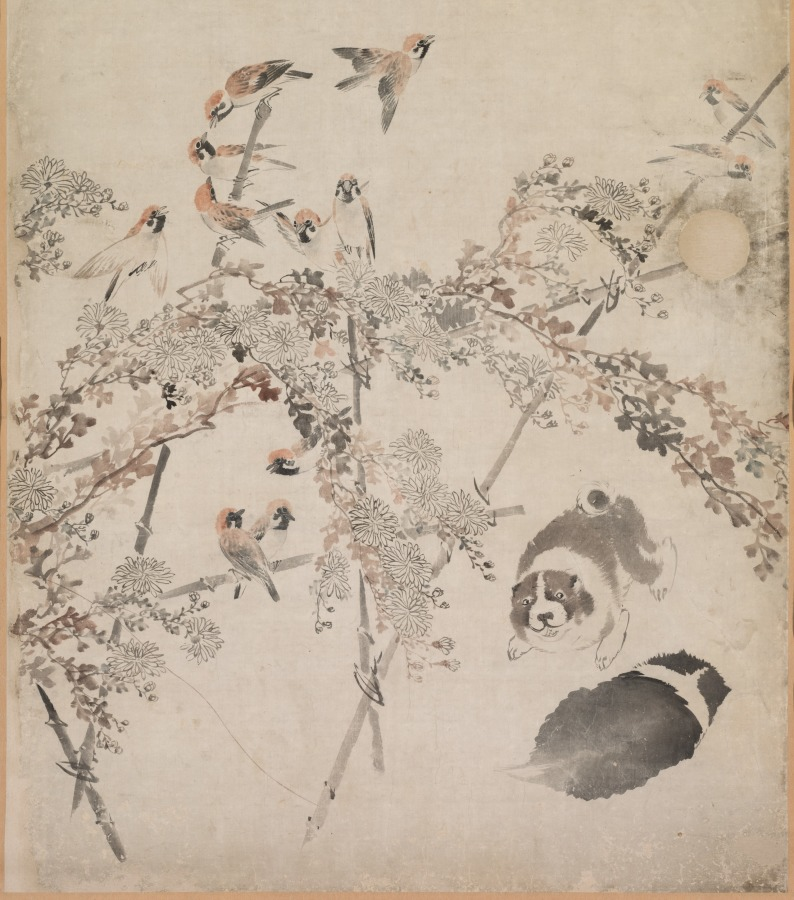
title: Puppies, Sparrows, and Chrysanthemums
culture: Japan, Edo period (1615–1868)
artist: Nagasawa Rosetsu (Japanese, 1754–1799)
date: c. 1792–94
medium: Fusuma panel remounted as a hanging scroll; ink and slight color on paper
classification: Painting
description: These paintings were originally mounted as sliding doors (fusuma) used inside a building. The circular areas on the paintings’ paper surfaces are traces of the former positions of the door pulls (hikite). A flock of sparrows gathers on a trellis supporting flowering chrysanthemum. Below is a litter of puppies, some cavorting, others napping. The tender story created by the curious puppy peering up and tilting its head to listen to the bird’s insistent call (in the leftmost part of the composition) is characteristic of Nagasawa Rosetsu’s paintings, which often use animals to illustrate the human condition.